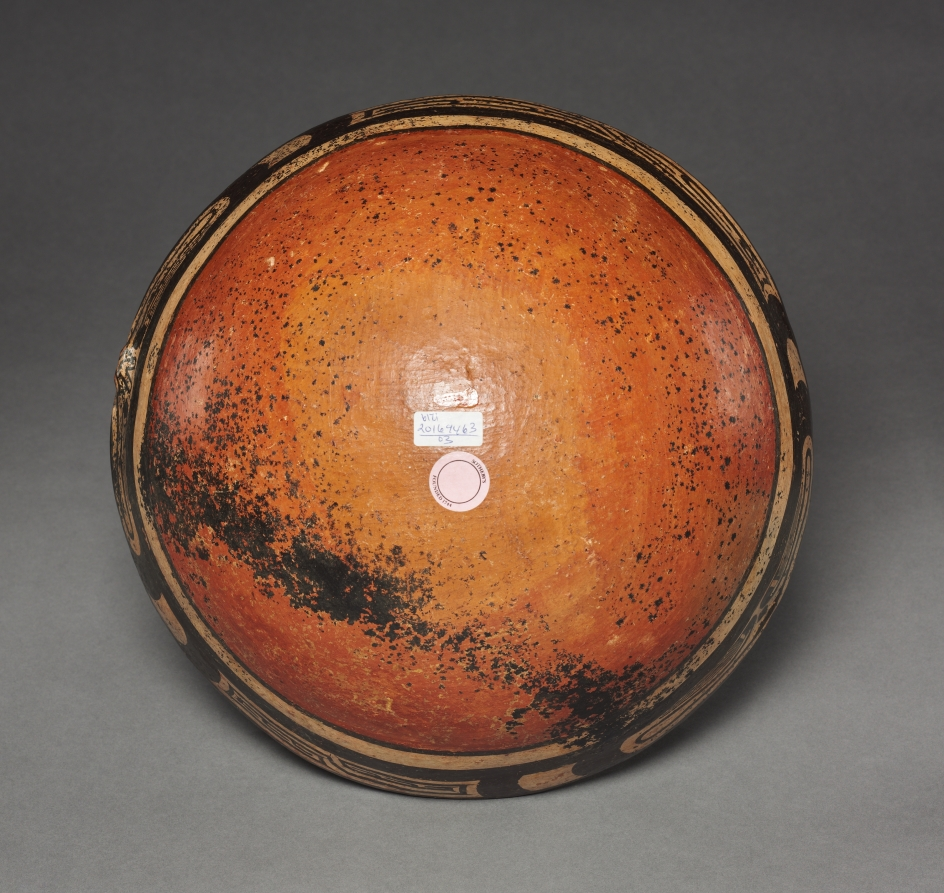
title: Vessel: Turtle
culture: Panama, Parita style, 11th-14th century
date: 1000–1300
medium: ceramic, slip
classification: Ceramic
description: Many Panamanian ceramics are among the most handsome and deftly designed in the Americas. Note how cleverly the artist used the vessel shape to imitate a turtle's carapace, its head peering out from its shell, its feet painted on the back (no. 10). And the stingray floats atop its pedestal, as though gliding through water (no. 9). Lamentably, little is known about the meaning of these witty ceramics.